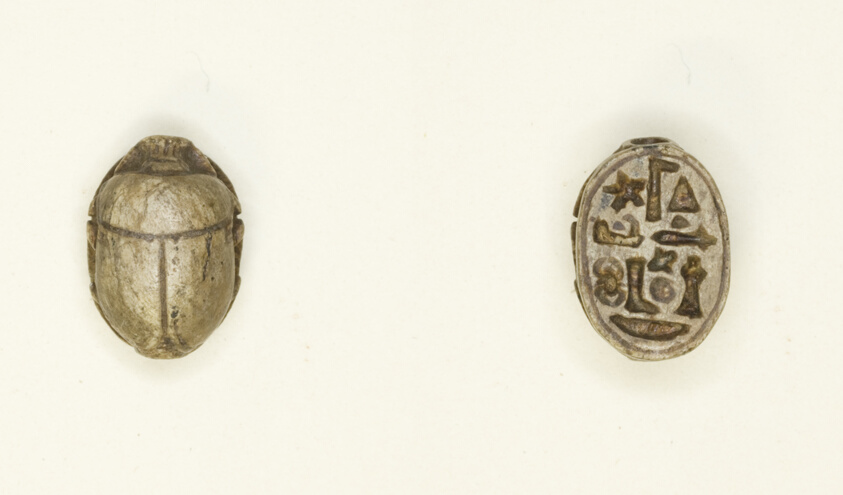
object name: Costume and Accessories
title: Scarab: Title and Personal Name (?)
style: egyptian, twenty-sixth dynasty, twenty-fifth dynasty, third intermediate period, late period (egyptian), ancient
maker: Egyptian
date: Third Intermediate Period–Late Period (?), Dynasties 25–26 (about 747–525 BCE)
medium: Steatite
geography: Egypt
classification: scarab; ancient art; costume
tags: scarab beetle, Hieroglyphs